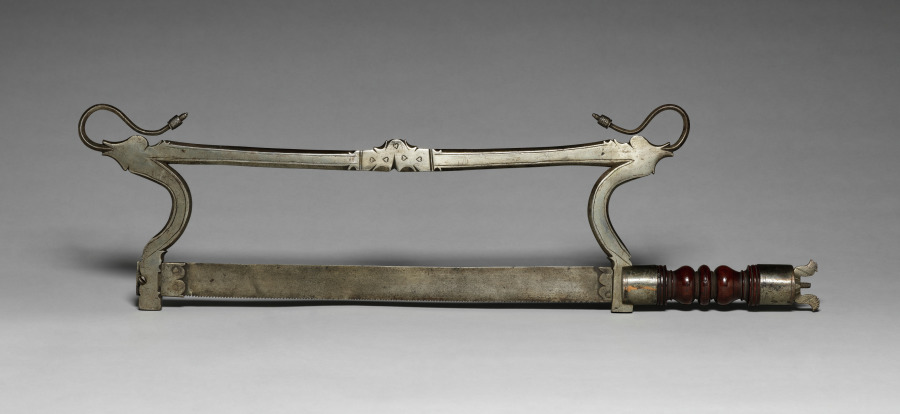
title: Hand Saw with Blade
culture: Europe, 17th century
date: 1600s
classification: Tool